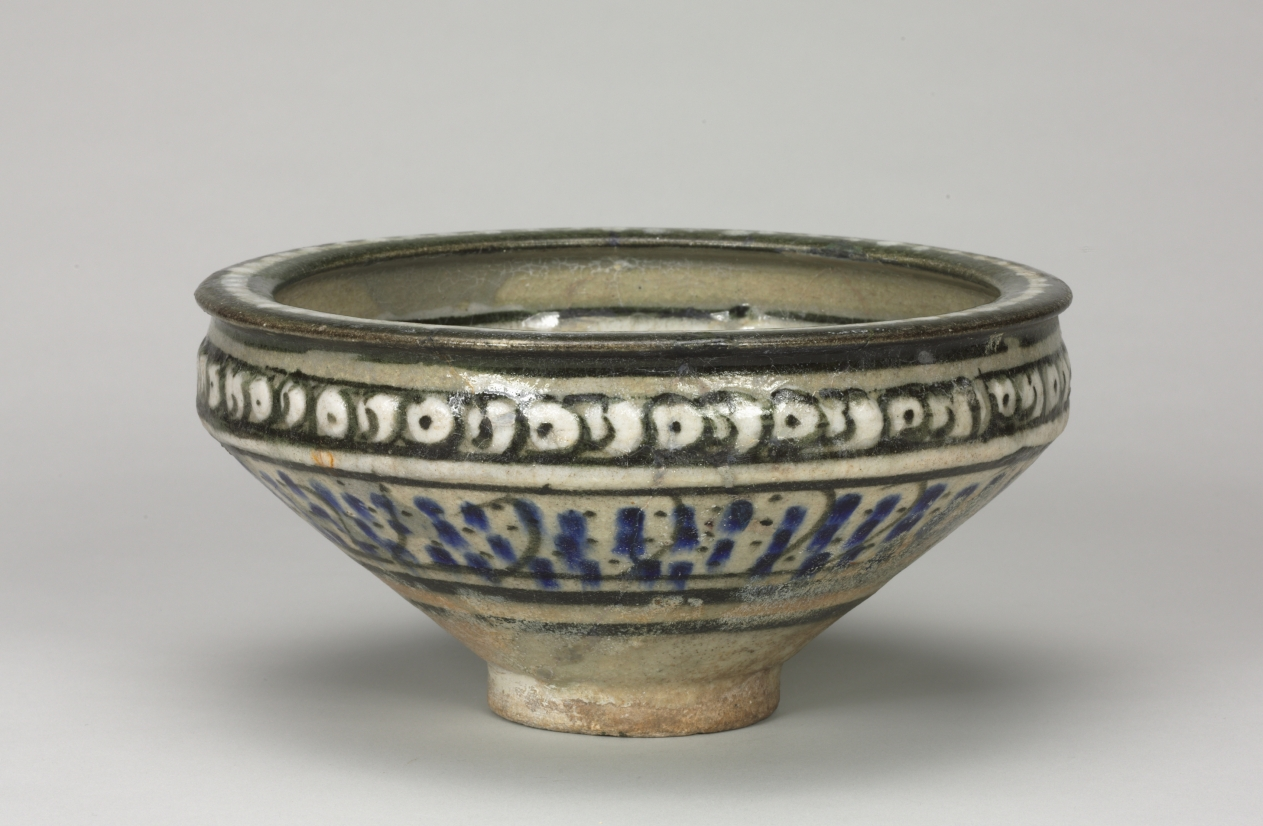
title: Bowl with Flying Birds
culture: Iran, probably Kashan, Ilkhanid period (1256–1353)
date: 1280–1400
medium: Fritware with underglaze-painted design, Sultanabad ware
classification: Ceramic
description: During the Ilkhanid period, decorative motifs from China were adopted into Persian art, including dragons, phoenixes, and lotus blossoms, which are seen on this bowl. Lotus blossoms were easily integrated into the existing tradition of floral and vegetal elements in Islamic art, while the phoenix was equated with the simurgh, a mythical bird known from the epic Persian poem the Shahnameh, or Book of Kings. The white slip designs on a gray background are typical of these wares, while the flat rim is influenced by Chinese vessels. This type of pottery was widely exported, and possibly imitated, as it has been found in excavations from Central Asia to Egypt.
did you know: This bowl was made after the Mongol conquest of Iran in the 13th century.